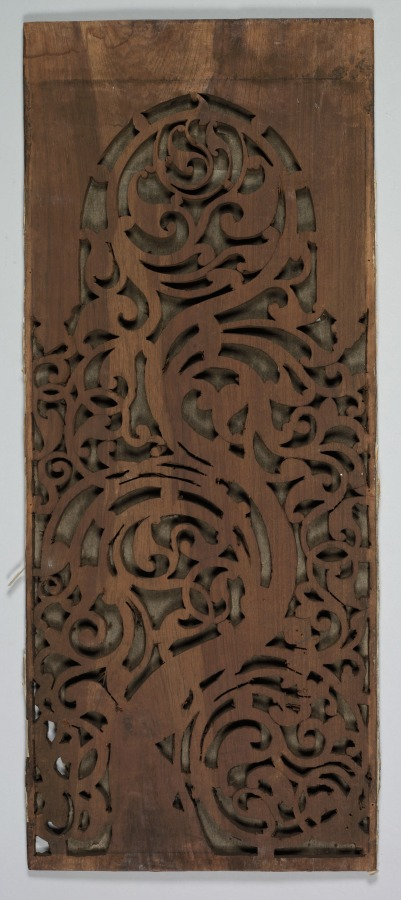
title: Carved Wood Panel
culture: India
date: c. 1875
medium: wood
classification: Wood